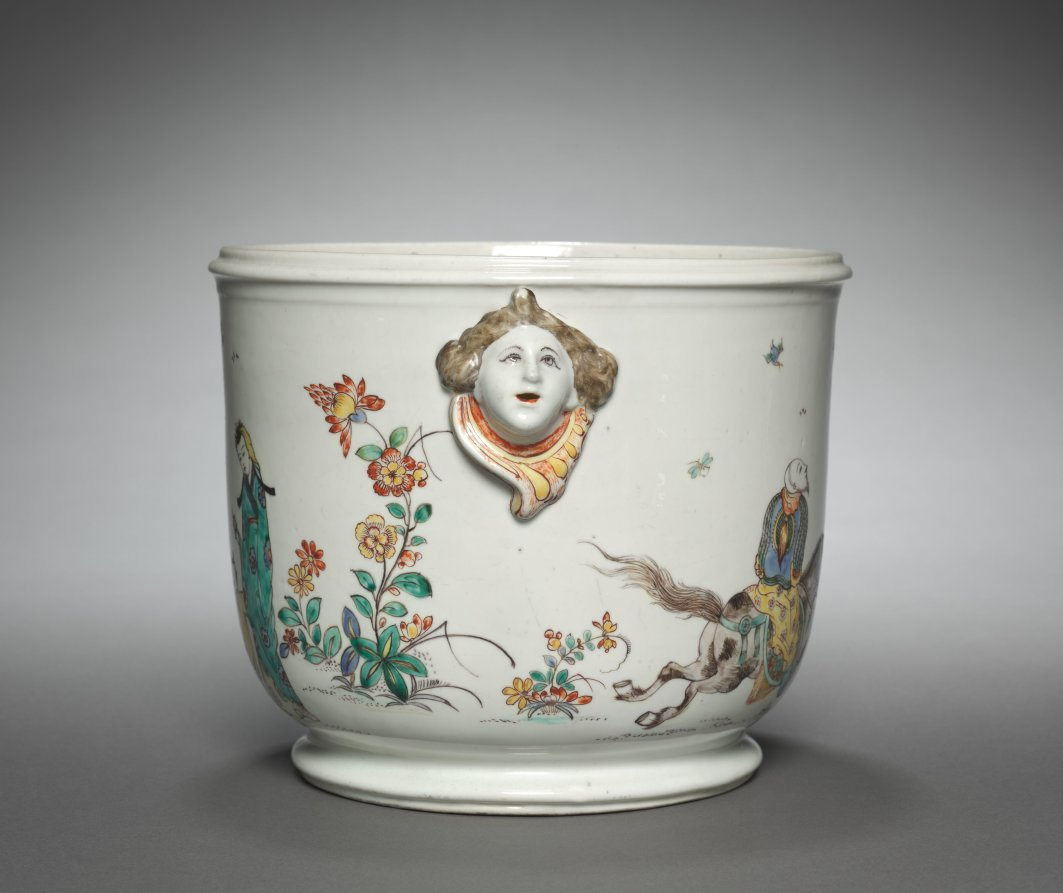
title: Bottle Cooler (seau a bouteille)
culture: France, Mennecy, 18th century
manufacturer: Mennecy- Villeroy Factory (French)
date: c. 1755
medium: Tin-glazed soft-paste porcelain with enamel decoration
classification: Ceramic